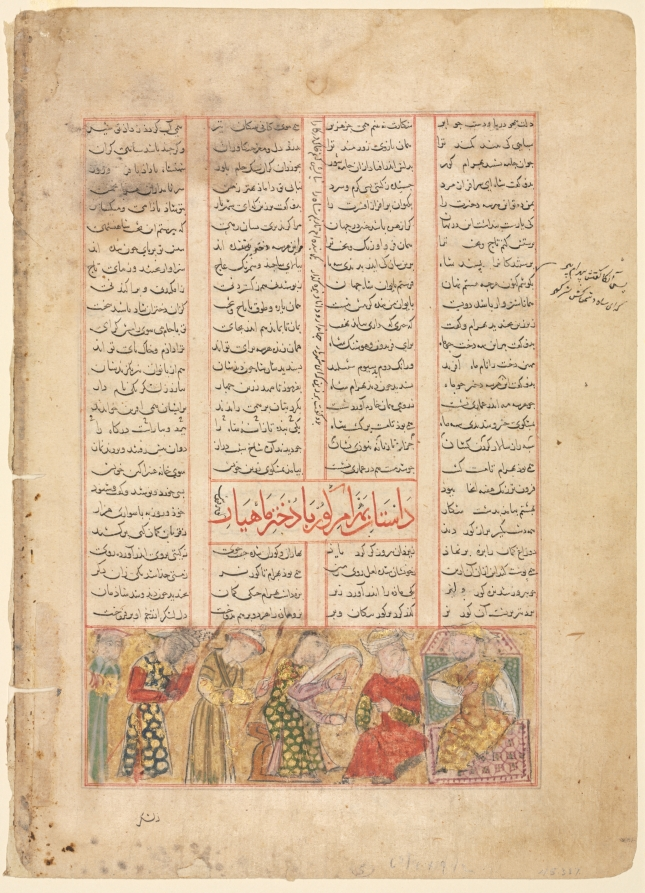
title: Bahram Gur meets Arzu, the Daughter of Mahiyar (verso); Illustration and Text, Persian Verses, from the Shahnama of Firdawsi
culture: Iran, Shiraz, Inju Period, 14th Century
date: c. 1350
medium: opaque watercolor and ink on paper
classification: Manuscript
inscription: script: Naskh